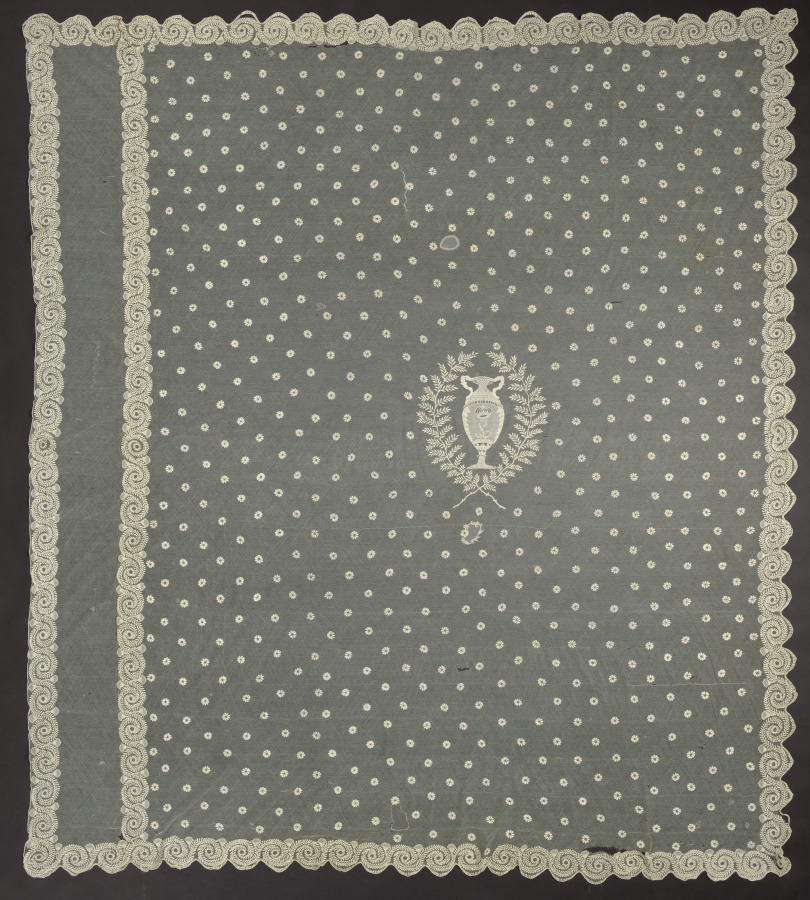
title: Lace Bed Canopy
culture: France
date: 1811–15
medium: Cotton: machine-made lace net; embroidery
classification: Lace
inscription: "L" embroidered on vase.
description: In the center of this bed canopy is a vase embroidered with the letter "L" and a coronet above it and a wreath of leaves surrounding it.